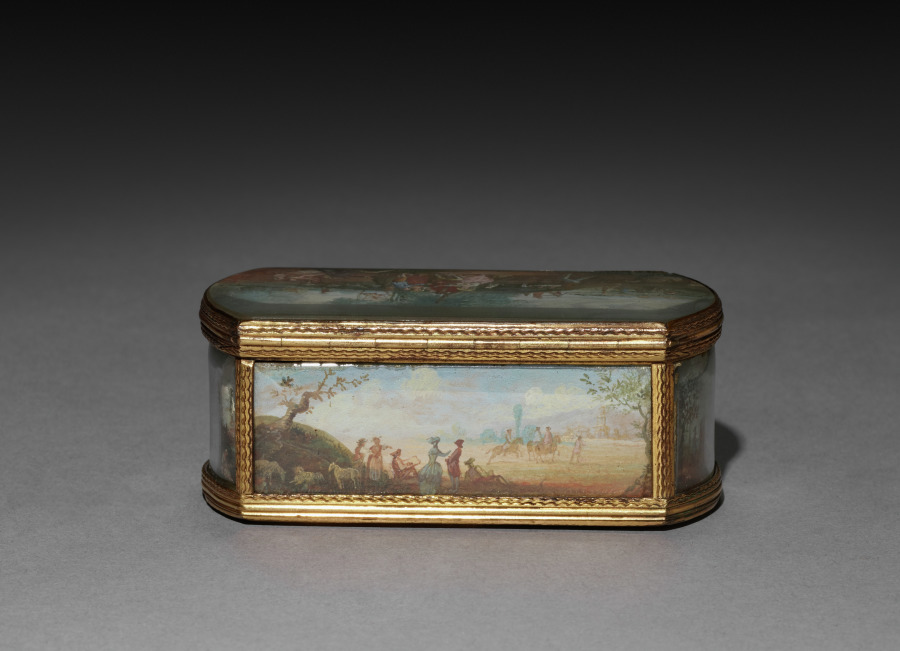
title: Snuff Box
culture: France, 19th century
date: 1800s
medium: gilt metal box with painted miniatures under glass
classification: Miscellaneous